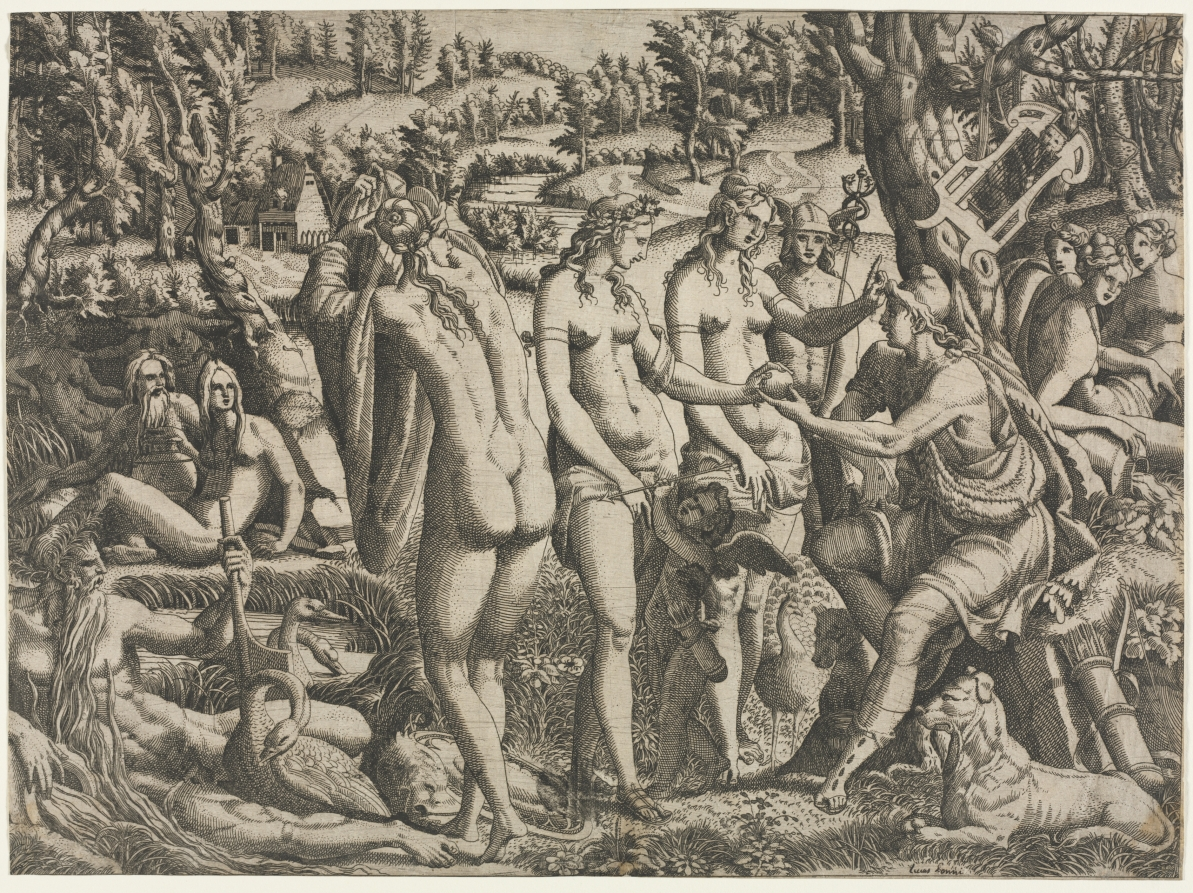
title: The Judgment of Paris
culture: France, 16th century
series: The Trojan War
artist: Jean Mignon (French, active c. 1535–55)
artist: after Luca Penni (Italian, 1500/04–1557)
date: c. 1545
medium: etching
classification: Print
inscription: lower right, in pen and brown ink: Lucas Penni ; VERSO, upper right, in pen and brown ink: .0 ; upper center, in pen and brown ink: Primatice[?]oubli ; lower center, in pen and brown ink: Luc Penni ; lower right, in pen and brown ink: ai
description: Printmaking at Fontainebleau flourished briefly during the 1540s and seems to have stopped altogether by 1547. Jean Mignon was one of the four major etchers whose works are most closely associated with the workshop there. Almost all of Mignon's prints reproduce drawings by Luca Penni (1500/4-1557), an Italian painter active at the chateau. Penni's Judgment of Paris derives from Marcantonio's famous engraving after Raphael. Here, jean Mignon's etching shows the shepherd Paris called upon to decide which of three goddesses (Juno, Minerva, or Venus) is the fairest. This mythological beauty contest leads to the Trojan War.